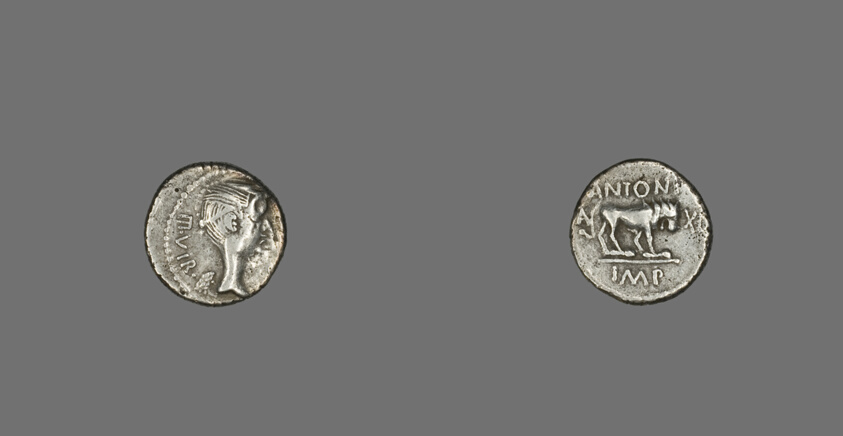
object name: Coin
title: Quinarius (Coin) Depicting the Goddess Victory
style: republic period, ancient, roman (ancient, style or period)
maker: Roman, minted in Gallia Transalpina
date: about 43-42 BCE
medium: Silver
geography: Italy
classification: coin; ancient art; struck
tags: goddesses, lions